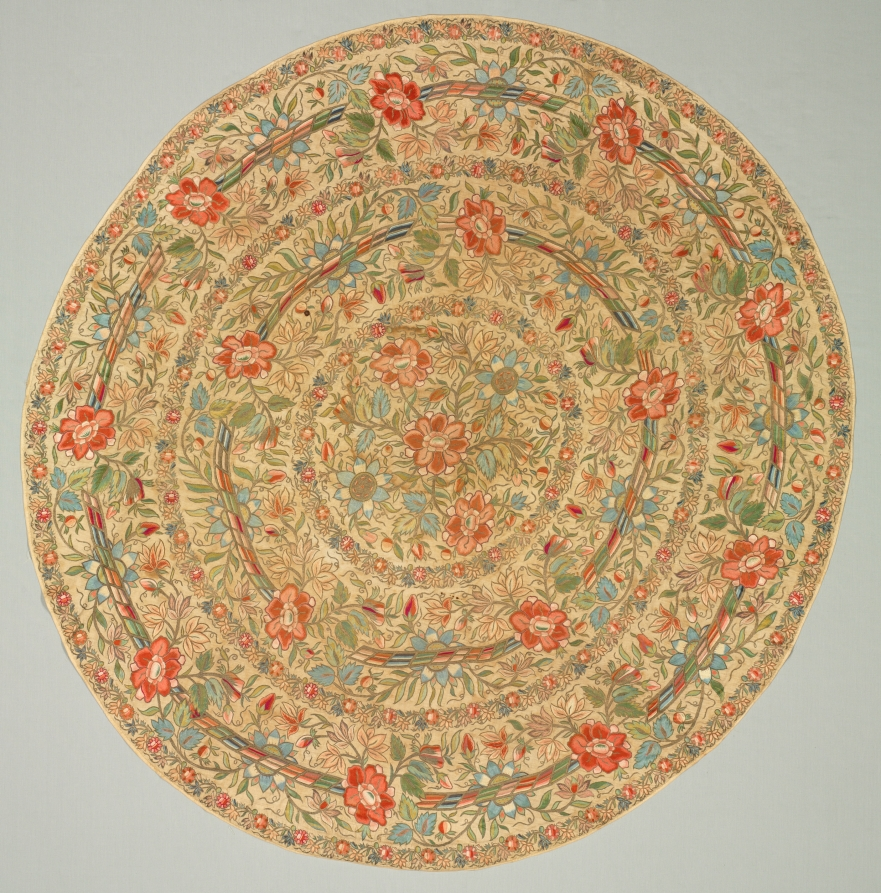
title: Embroidered tray cover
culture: Turkey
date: 1800s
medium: plain weave: linen; embroidery, chain stitch: silk and gilt-metal thread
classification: Embroidery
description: Elaborately embellished round embroideries often covered the metal trays that accompanied traditionally gracious Turkish hospitality and cuisine. Here, exuberant floral displays and garlands bearing large blossoms with shaded petals enrich the circular designs that feature extravagant gilt-metal thread and many lush colors of silk thread. The embroidered stitches almost conceal the linen ground in a spectacular tour-de-force.